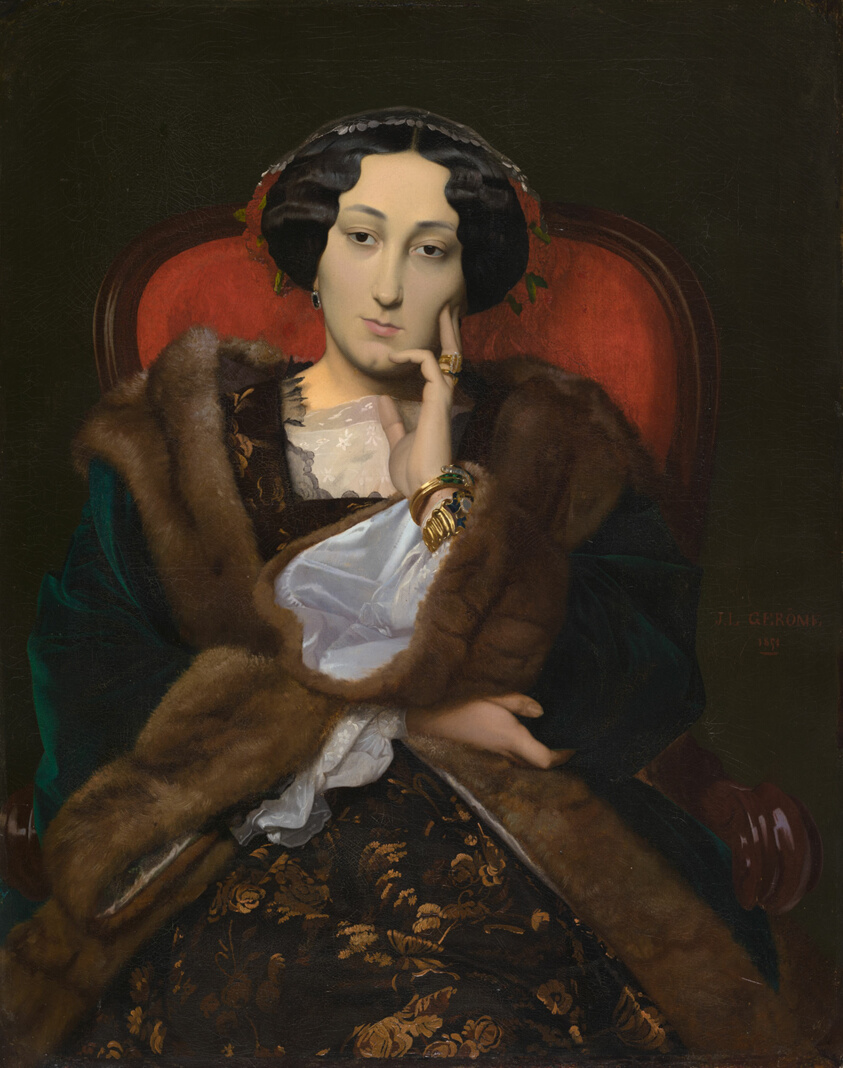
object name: Painting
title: Portrait of a Woman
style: nineteenth century, 19th century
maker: Jean Léon Gérôme (French, 1824–1904)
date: 1851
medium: Oil on canvas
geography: France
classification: oil on canvas; french; oil paintings (visual works); paint; portrait; painting; european painting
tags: portraits: female subject, wealth, luxury, jewelry, fashion, red (color), chair, woman, portraits, portrait